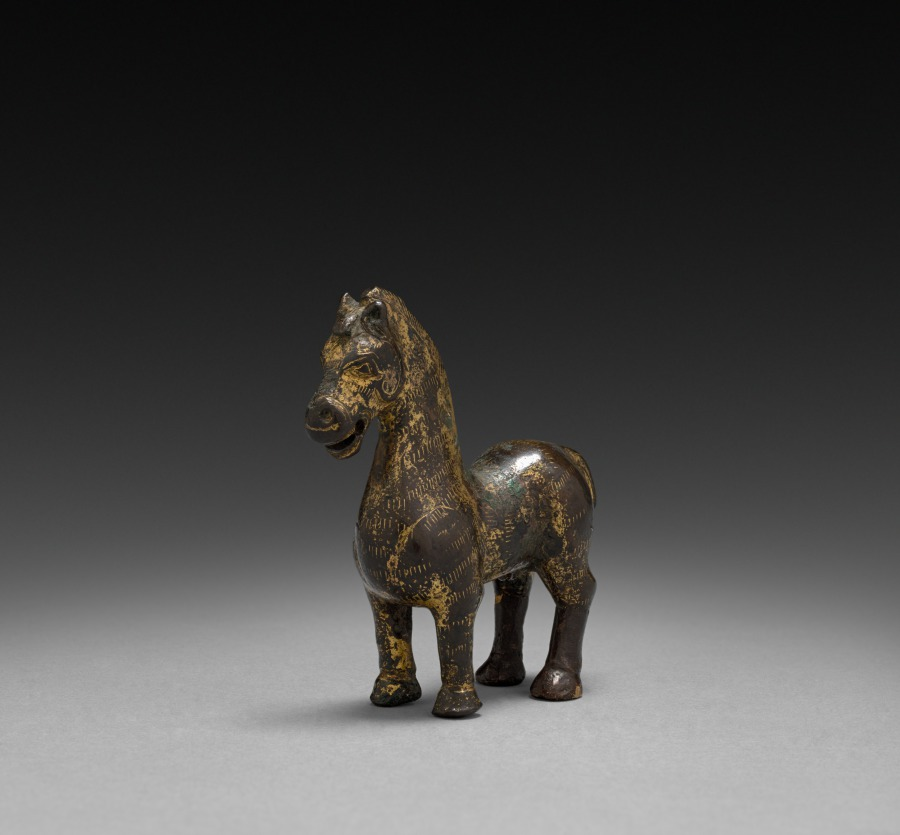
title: Horse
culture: China, Ordos Region, Han dynasty (202 BCE–220 CE)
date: 202 BCE–220 CE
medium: gilt bronze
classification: Sculpture